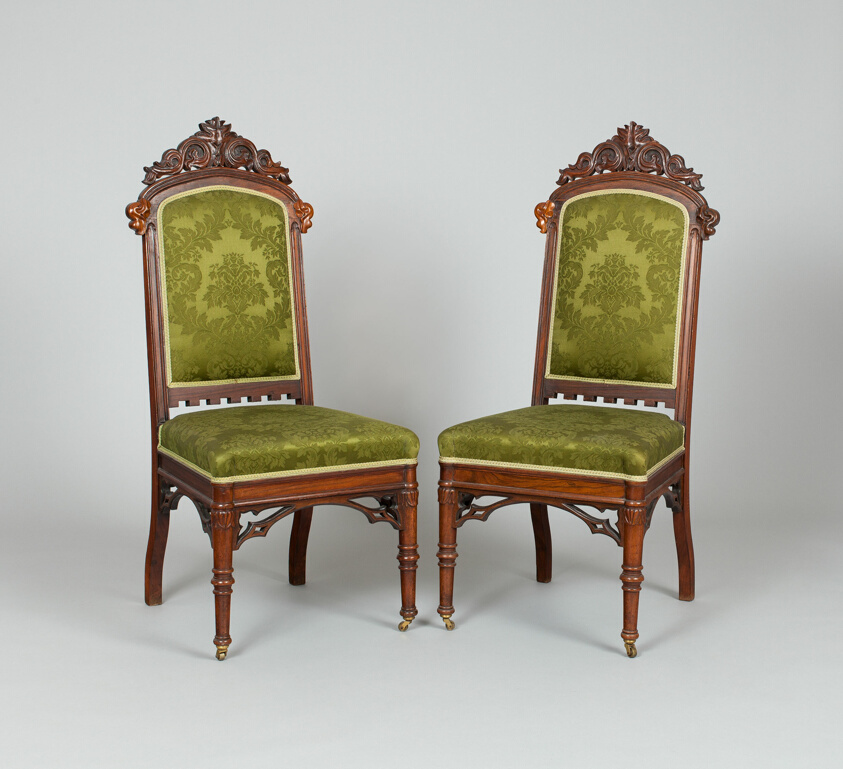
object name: Furniture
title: Pair of Side Chairs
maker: Alexander Jackson Davis; American, 1803–1892; Made by William Burns and Peter Trainque; American, active 1842–56; New York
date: c. 1849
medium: Rosewood and upholstery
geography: New York City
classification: seating; furniture; american decorative arts; american arts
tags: furniture